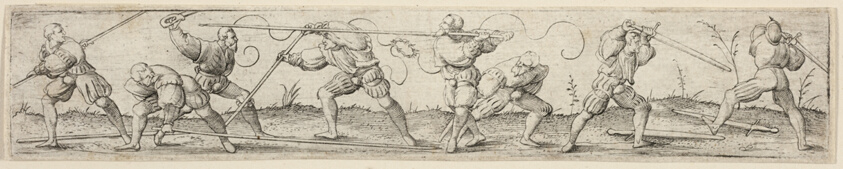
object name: Print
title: Eight Soldiers Engaged in Fencing Exercises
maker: Virgil Solis, the Elder; German, 1514-1562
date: c. 1541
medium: Etching in black on ivory laid paper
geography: Germany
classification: etching; print; prints and drawing